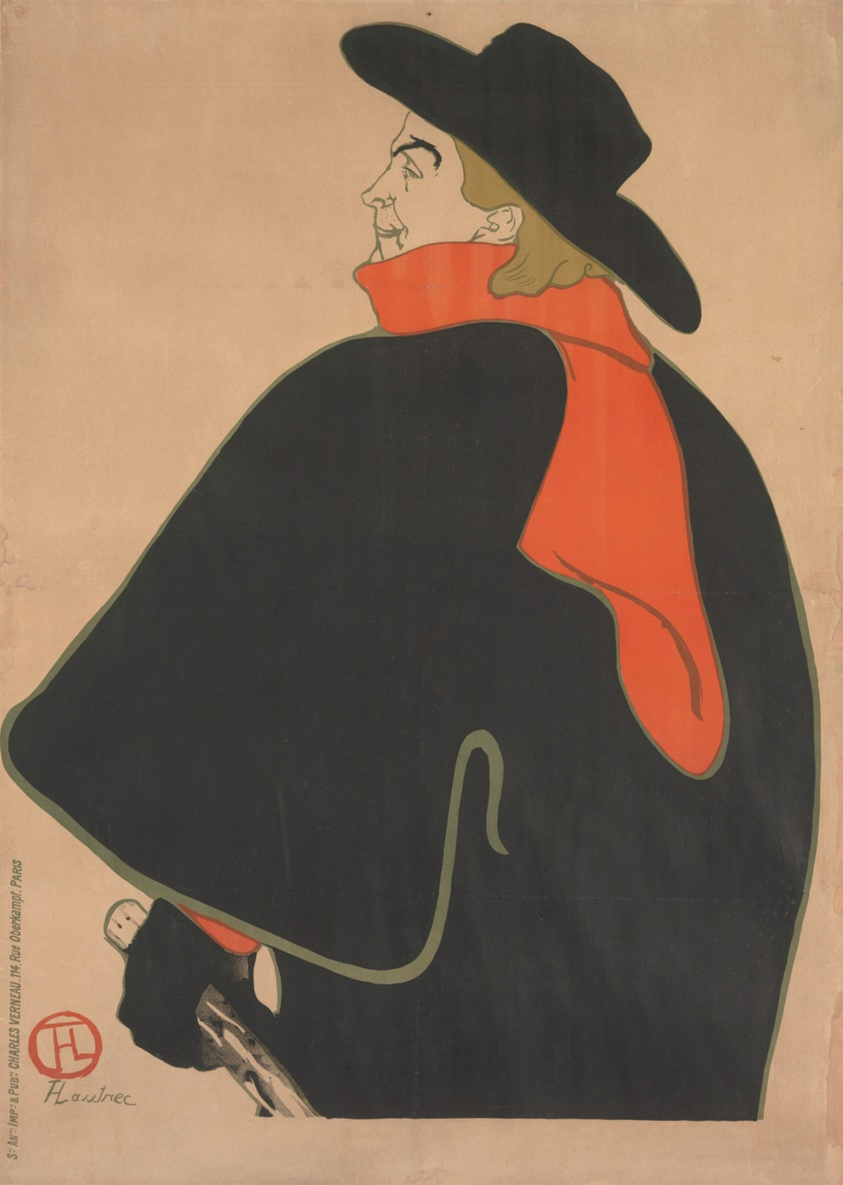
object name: Print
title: Aristide Bruant, in His Cabaret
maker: Henri de Toulouse-Lautrec (French, 1864-1901)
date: 1893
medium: Color lithograph on tan wove paper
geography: France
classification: poster; print; prints and drawing